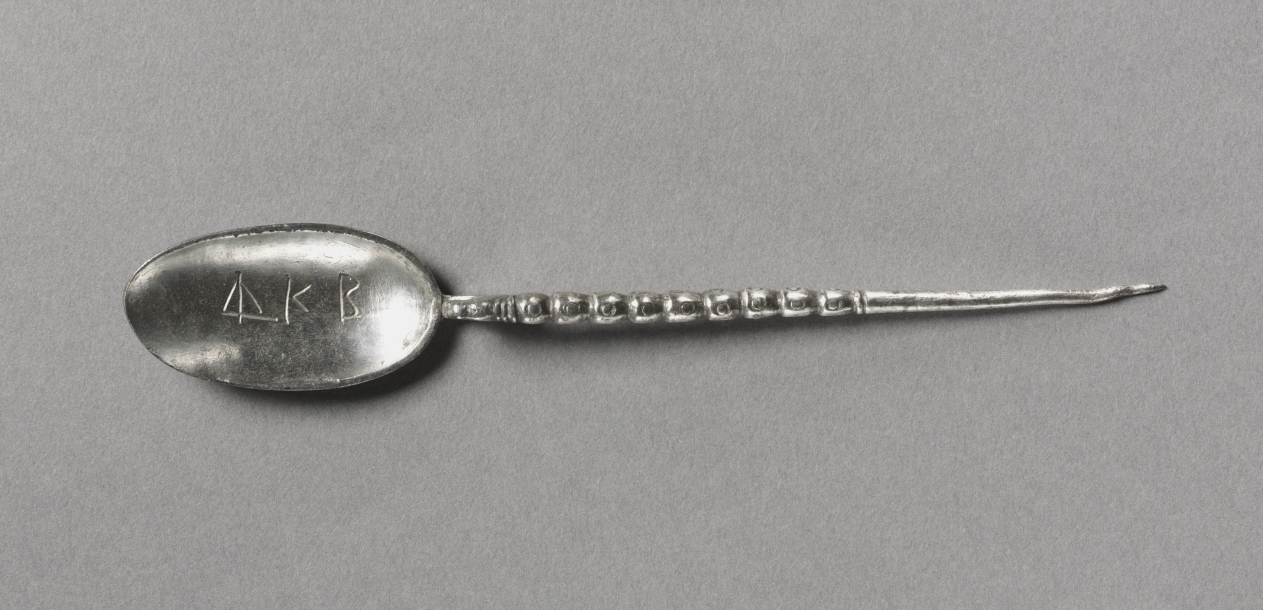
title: Spoon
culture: Byzantium, Syria(?), Byzantine period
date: 300s CE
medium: silver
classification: Metalwork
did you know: The handle of this spoon is delicately detailed with beaded ornament while its handle twists, ending in a sharp point. Timeless in design, this spoon would not seem out of place in a modern table setting.